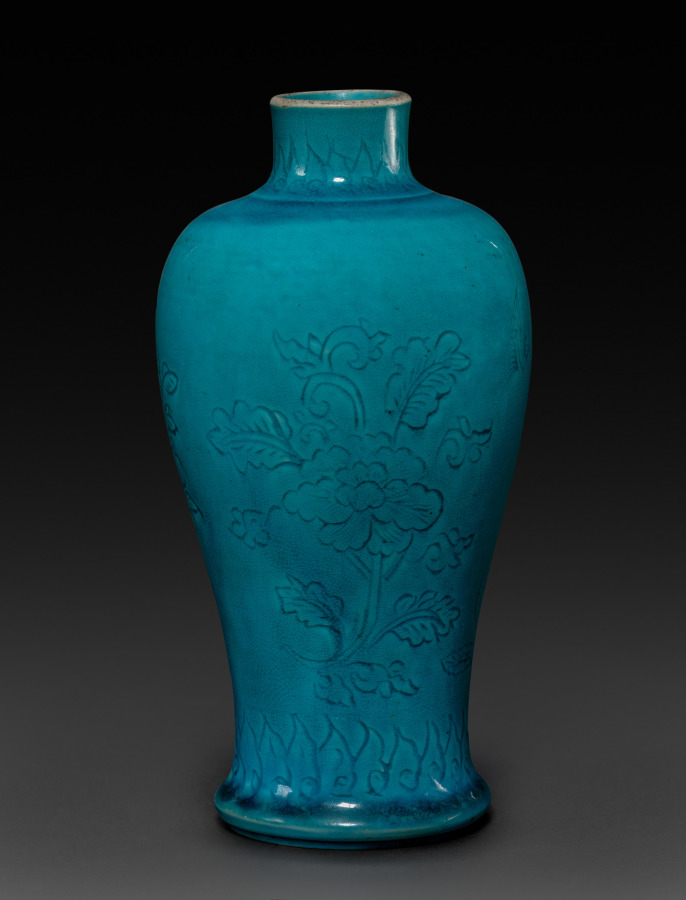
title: Vase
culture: China, Qing dynasty (1644-1911), Kangxi reign (1662-1722)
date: 1662–1722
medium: porcelain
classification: Ceramic